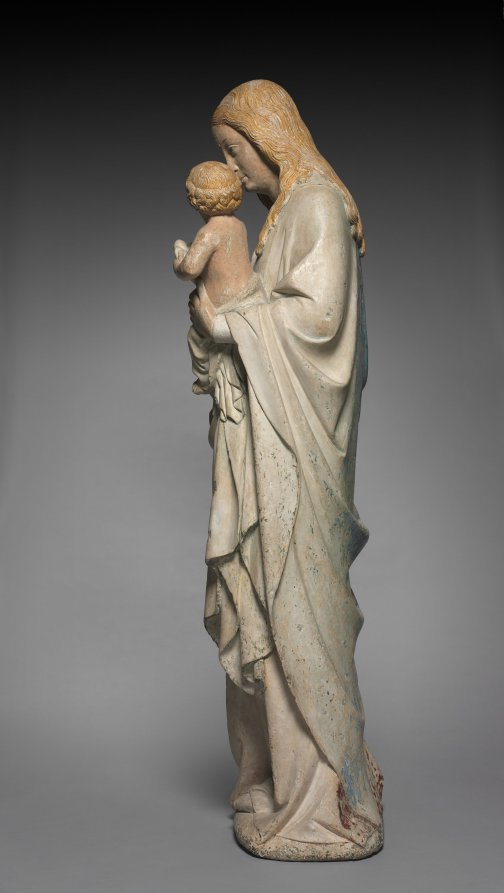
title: Virgin and Child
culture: France, Loire Valley, 14th century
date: c. 1385–90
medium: limestone with traces of polychromy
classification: Sculpture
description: The vibrant naturalism of the Virgin’s face and long flowing hair, as well as the deep, rich folds of drapery are characteristic of the work of itinerant artists from the Netherlands who found employment at the Valois courts of France at Paris, Berry, and Burgundy. Their native styles and attention to realistic detail fused with native French artistic traditions toward the end of the 14th century and took root. The original source of this Virgin and Child is unknown, but its style suggests a relationship with similar sculptures made for churches and abbeys of the Central Loire Valley. The additional influence of the style of the sculptor André Beauneveu has also been noted for this sculpture. His commissions were abundant and his influence widespread. The sculptor of this work appears to have had some knowledge of Beauneveu’s work in the Loire region.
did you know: This sculpture was painted over many times over its history, common for medieval sculpture.